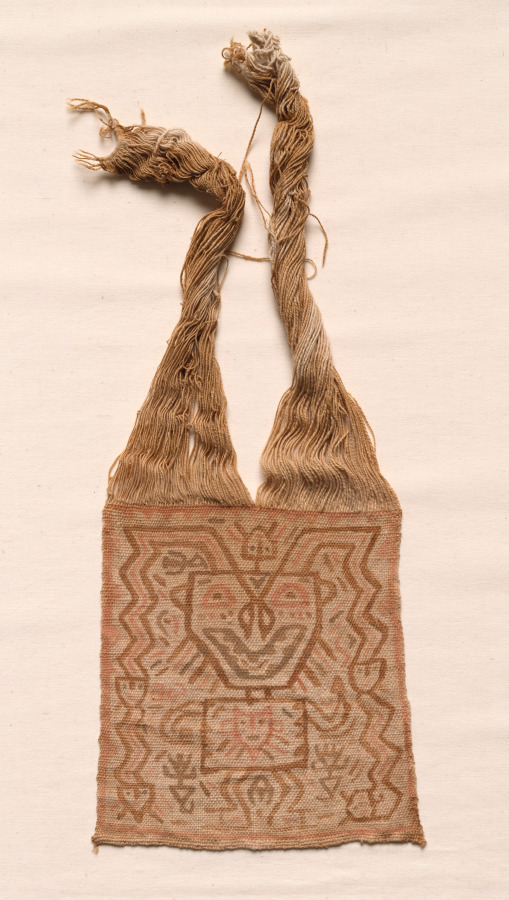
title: Mummy Bundle "Mask"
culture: Peru, South Coast, Ica Valley, Ocucaje site, Paracas style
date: 200–1 BCE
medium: cotton: plain warp-faced cloth, painted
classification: Textile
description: The Paracas people buried their dead in pear-shaped mummy bundles, created by carefully wrapping the seated human body in layers of garments and other textiles. Sometimes a painted cloth was placed on the outer layer at the top of the bundle, as though it served as the bundle’s face, head, or “mask.” Some cloths were painted with masklike faces, although others—such as this example—feature complete figures, which may be mythological beings with supernatural appendages.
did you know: These masks fall into two categories, those with only a face and those with a full-bodied figure.